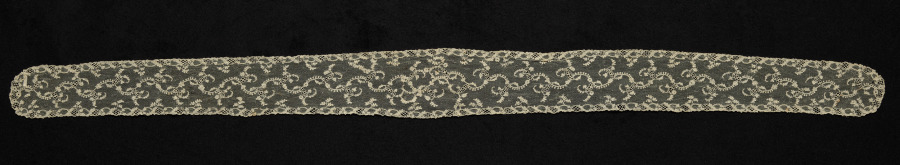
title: Lace Edging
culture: Belgium, Brussels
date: 1780s–90s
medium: Linen: needle lace and bobbin lace (appliqué)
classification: Lace